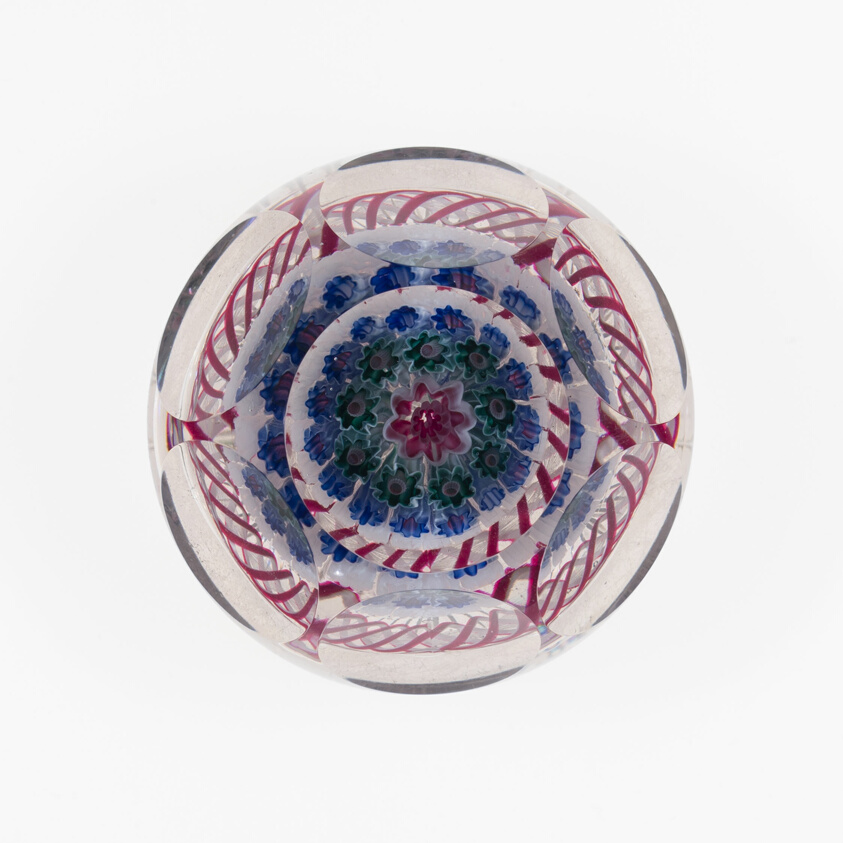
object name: Glass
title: Paperweight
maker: English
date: c. 1848–49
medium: Glass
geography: England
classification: paperweight; glass; european decorative arts